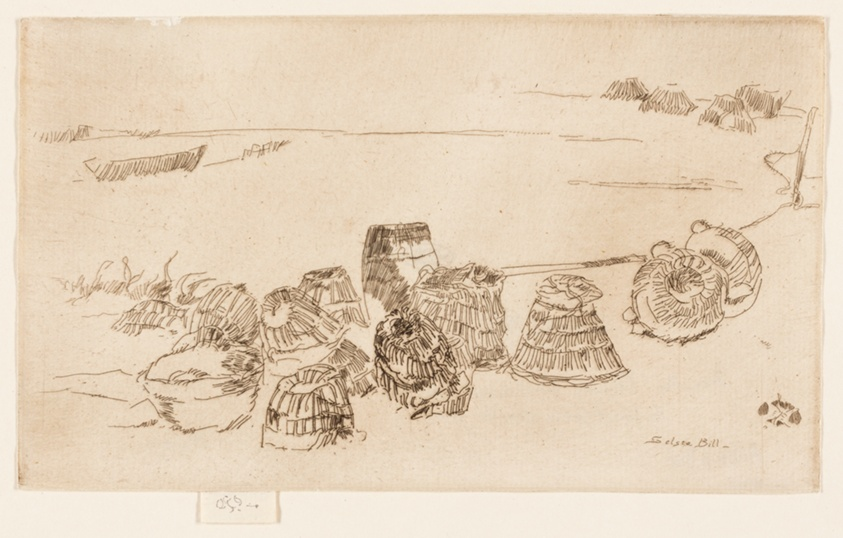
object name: Print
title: Lobster Pots - Selsea Bill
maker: James McNeill Whistler (American, 1834-1903)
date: 1880/81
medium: Etching and drypoint with foul biting in dark brown ink on ivory laid paper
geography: United States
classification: etching; foul biting; print; prints and drawing; paper; drypoint